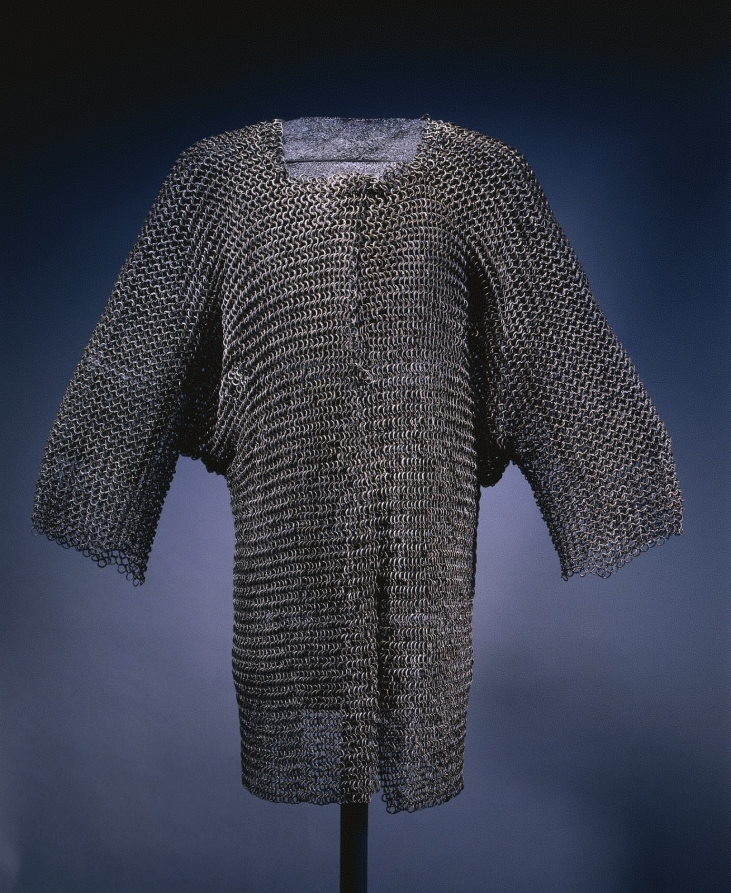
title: Hauberk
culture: European, 15th century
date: 1400s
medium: riveted steel rings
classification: Arms and Armor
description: A hauberk is a mail shirt commonly extending to mid-thigh. Mail, a type of armor made from interlocking iron or steel rings, was effective at protecting the wearer from the sharp cuts of a sword, and yet was less useful against crushing impacts from blunt weapons. A hauberk would have been worn over an aketon, a padded protective garment.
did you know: Although this hauberk weighs about 21 pounds, the even distribution of the weight makes it easy to wear.